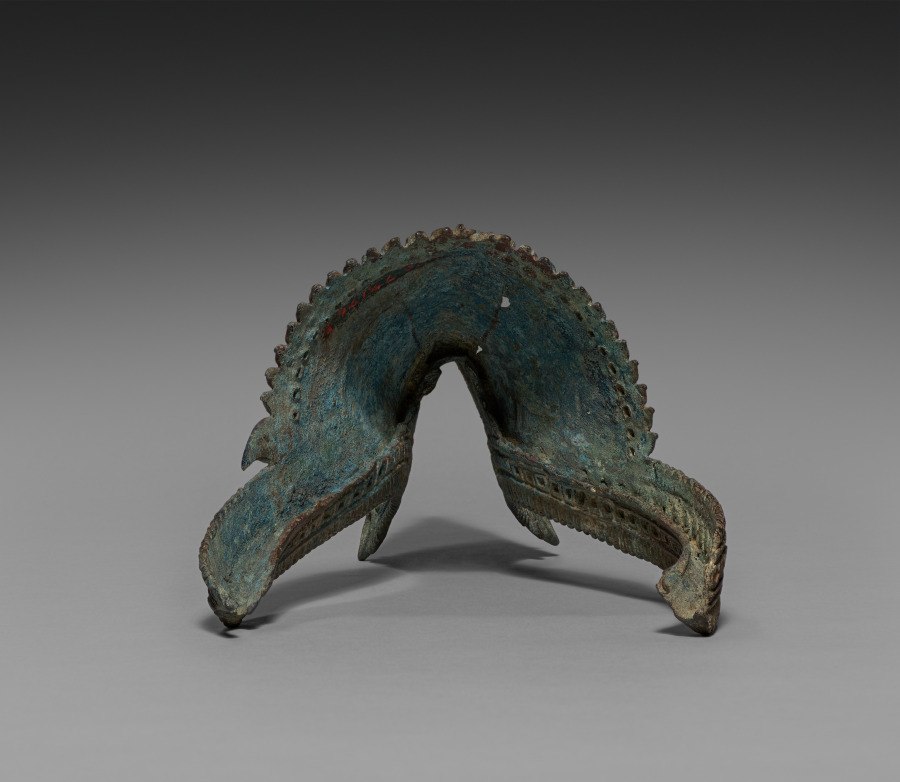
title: Sheath for ritual conch shell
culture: Cambodia, Khmer, Angkor period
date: 1100s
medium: shell and bronze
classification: Sculpture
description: A royal temple like Banteay Chhmar was built for performing rituals and to honor images of gods, Buddhas, and other sacred or enlightened beings for the sake of the kingdom’s protection and ongoing prosperity. Conch shells were blown at the start of rituals to make the sound corresponding to the syllable om. The dancing figure of Hevajra, a Buddhist being of enlightenment with eight heads, sixteen arms, and four legs, has been worked into the bronze embellishment of the shell. Hevajra was elevated to a prominent position in Khmer Buddhism of the Angkorian period as the standard figure denoting the practice of rituals prescribed in a text called the Hevajra-tantra. The tripod stand with three serpents is probably not original to the shell.